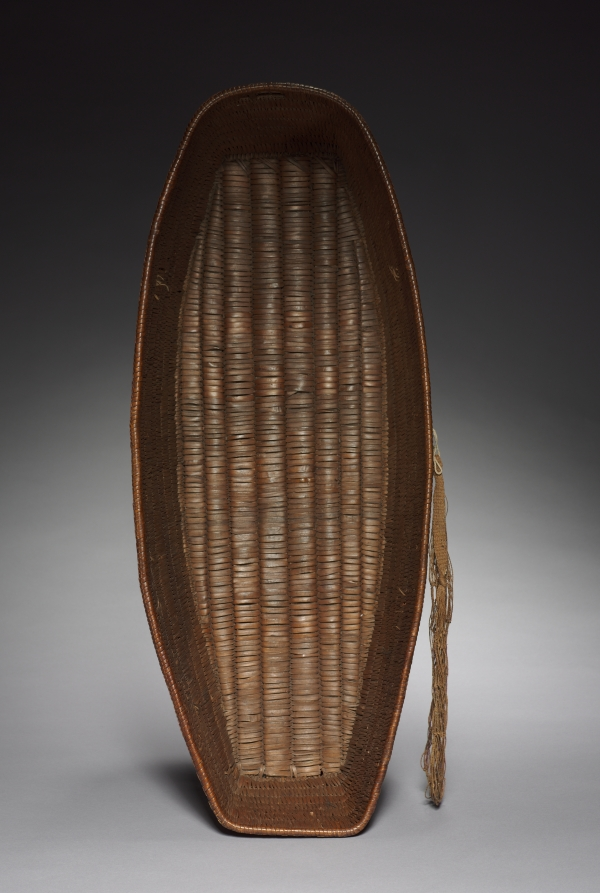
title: Baby Basket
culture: Northwest Coast, Frazer River, Salish, Late 19th century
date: c 1875– 1910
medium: basketry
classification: Basketry